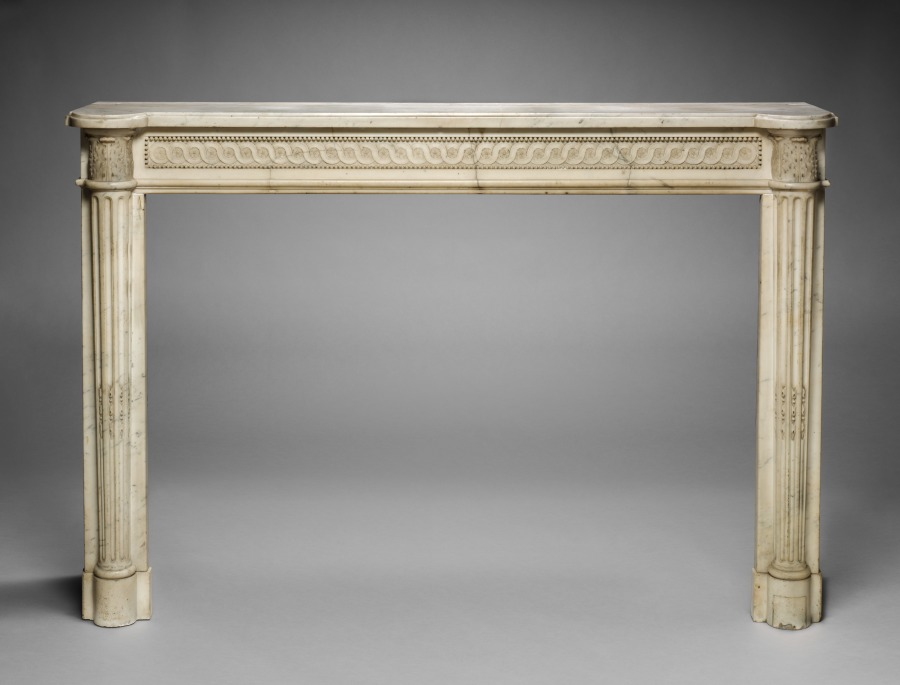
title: Mantel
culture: France, style of Louis XVI, 18th Century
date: c. 1770–1790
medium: marble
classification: Furniture and woodwork